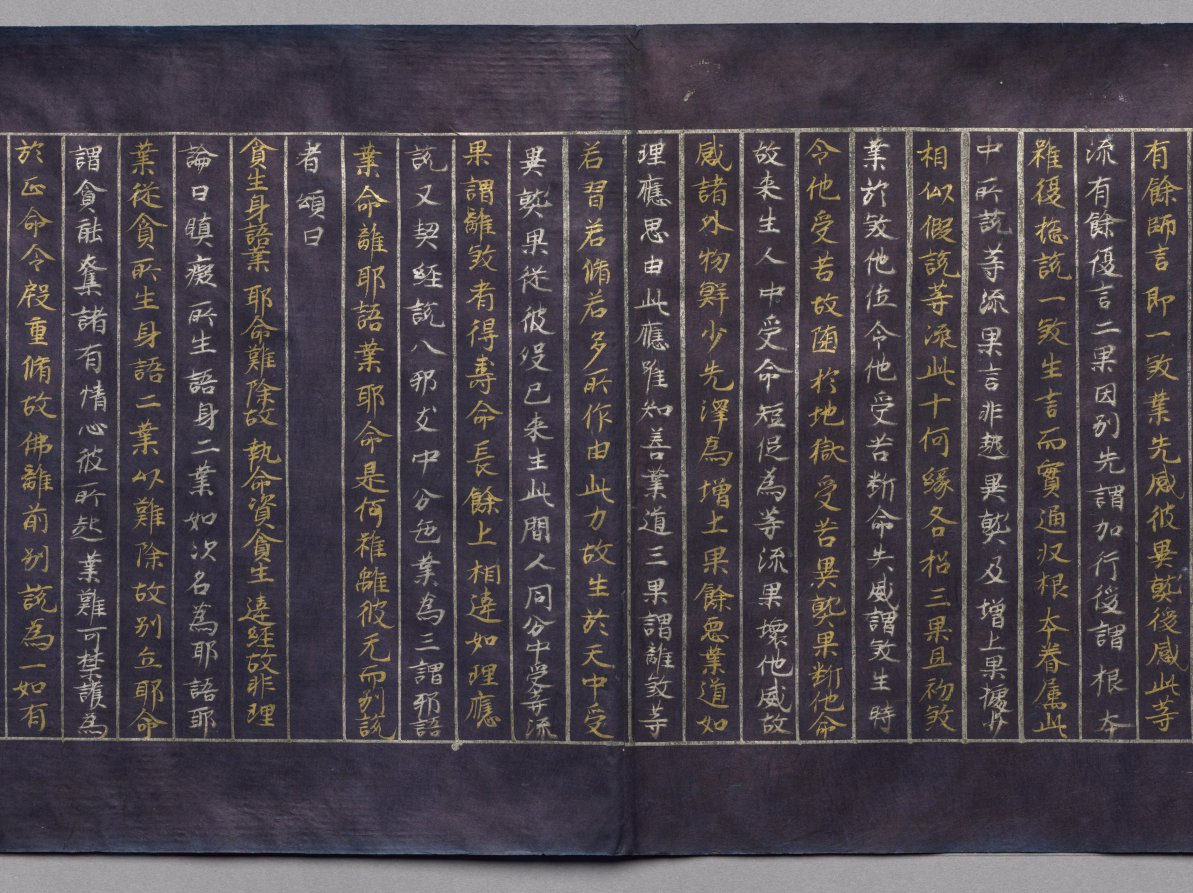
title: Meta-Discourse on the Teachings from the Treasury (Abidharmakosha-Bhashya)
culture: Japan, Heian period (794–1185)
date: 1100s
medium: handscroll; gold and silver on indigo-dyed paper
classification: Manuscript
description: This religious text relates some of the teachings of the great fourth-century Indian Buddhist scholar Vasubhandhu. The text analyzes human consciousness in its relationship to the environment and transformations that occur during meditation. This scroll is the 17th part of a 30-part translation of the text by Xuanzang, an eminent seventh-century Chinese monk.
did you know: The frontispiece depicts the Buddha Shakyamuni preaching in a paradisical landscape.